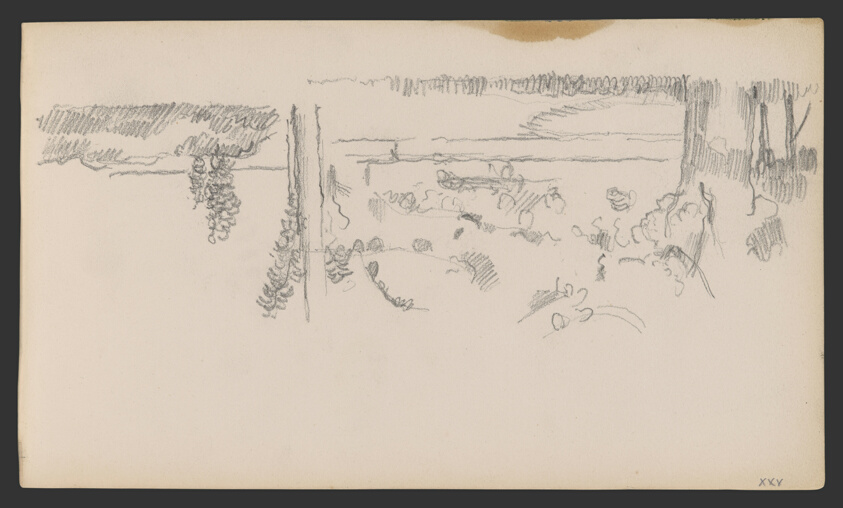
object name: Drawing and Watercolor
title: Sketchbook No. 2 (L'Estaque)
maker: Paul Cézanne; French, 1839-1906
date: 1875–86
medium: Graphite and pen and ink drawings on paper, bound into a book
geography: France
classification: sketchbook; graphite; prints and drawing; paper